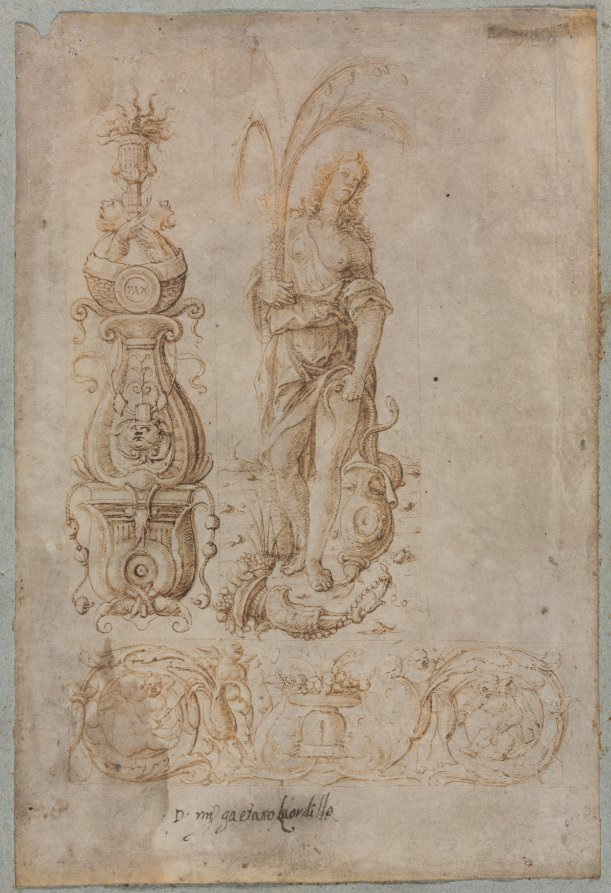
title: Design for a Candelabrum, Allegorical Figure of Abundance, Ornamental Relief Design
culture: Italy, late 15th century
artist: Bernardo Parentino (Italian)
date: c. 1490s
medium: pen and brown ink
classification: Drawing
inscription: Lower center: D . mi[o?] [likely an abbreviation for "Maestro"] gaetano Laordillo (brown ink)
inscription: Verso of secondary support, upper right: -[1?]9- (brown ink) center left: 65 (graphite)